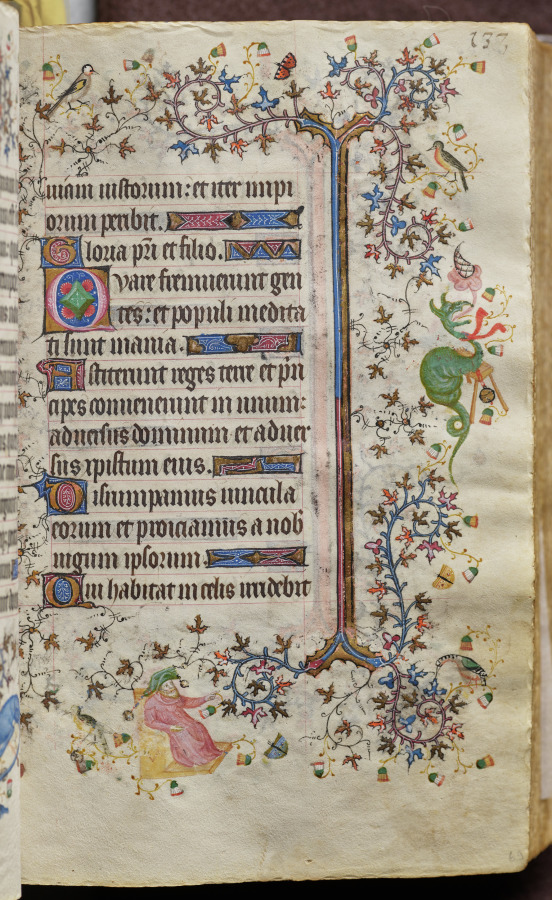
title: Hours of Charles the Noble, King of Navarre (1361-1425): fol. 69r, Text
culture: France, Paris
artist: Master of the Brussels Initials and Associates (French)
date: c. 1405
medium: ink, tempera, and gold on vellum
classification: Bound Volume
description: This precious volume was obviously highly prized by its owner, the French-born King of Navarre, who had his coat of arms painted on no less than twenty folios. Rather than directly commissioning this manuscript from a specific workshop, it seems that Charles the Noble acquired his book of hours -- perhaps ready-made for the luxury market -- while on a trip to Paris in 1404-05. A collaborative effort, six painting styles are evidenced within the pages of this codex, those of two Italians, two Frenchmen, and two Netherlanders. The painter who was responsible for the planning and decoration of the book, and who produced seventeen of the large miniatures, was a Bolognese artist known as the Master of the Brussels Initials. His principal assistant, responsible for most of the borders, was a Florentine who signed his name "Zecho" da Firenze on folio 208 verso.